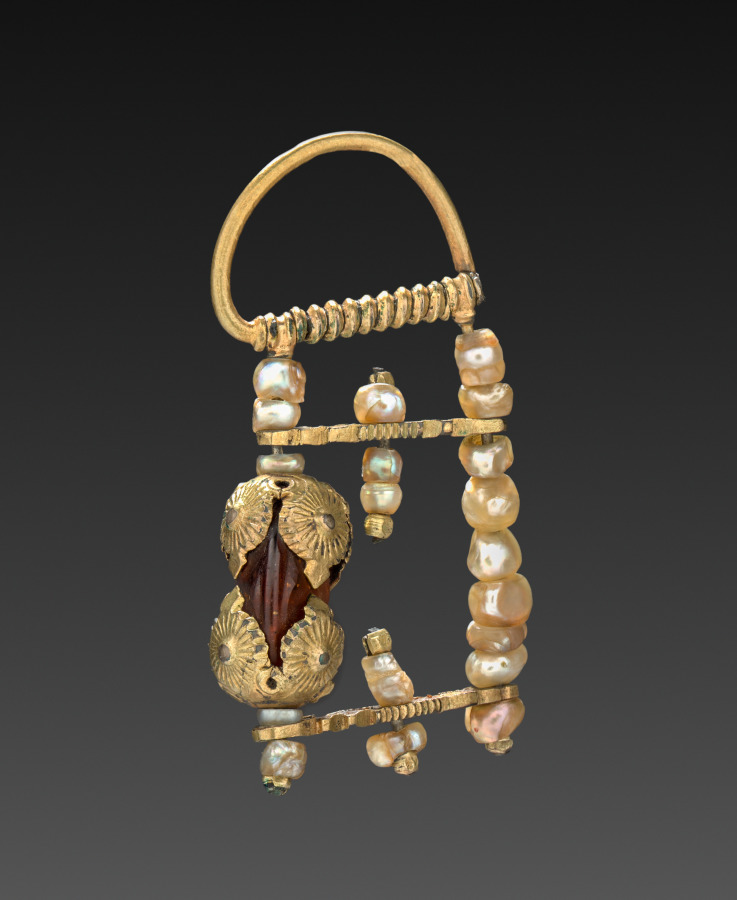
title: Earring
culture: Russia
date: 1800s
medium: silver gilt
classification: Jewelry